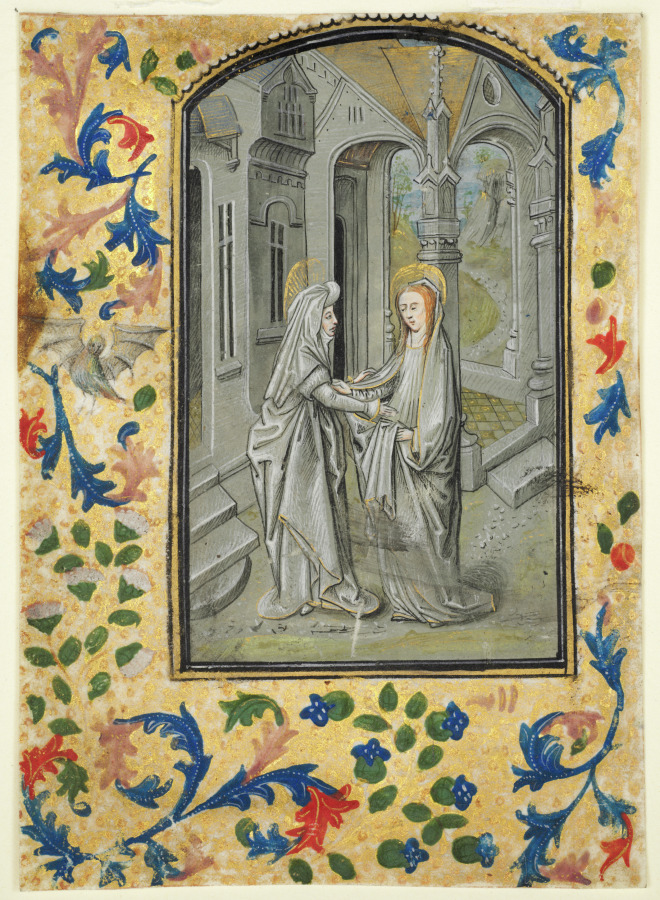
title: Leaf from a Book of Hours: The Visitation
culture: Flanders, Bruges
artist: Guillaume Vrelant (Flemish, c. 1454–1481)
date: c. 1470–1480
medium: tempera, liquid gold, and grisaille on vellum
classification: Manuscript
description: Guillaume Vrelant, born in Utrecht, was known to be in Bruges from 1454 onward where he died around 1481. He probably went there to sidestep a 1427 law which banned the sale of Utrecht images. A painter very much in vogue, he founded the Illuminators’ Guild in Bruges under the patronage of Saint John the Evangelist. He is known to have provided manuscripts to the Burgundian court.